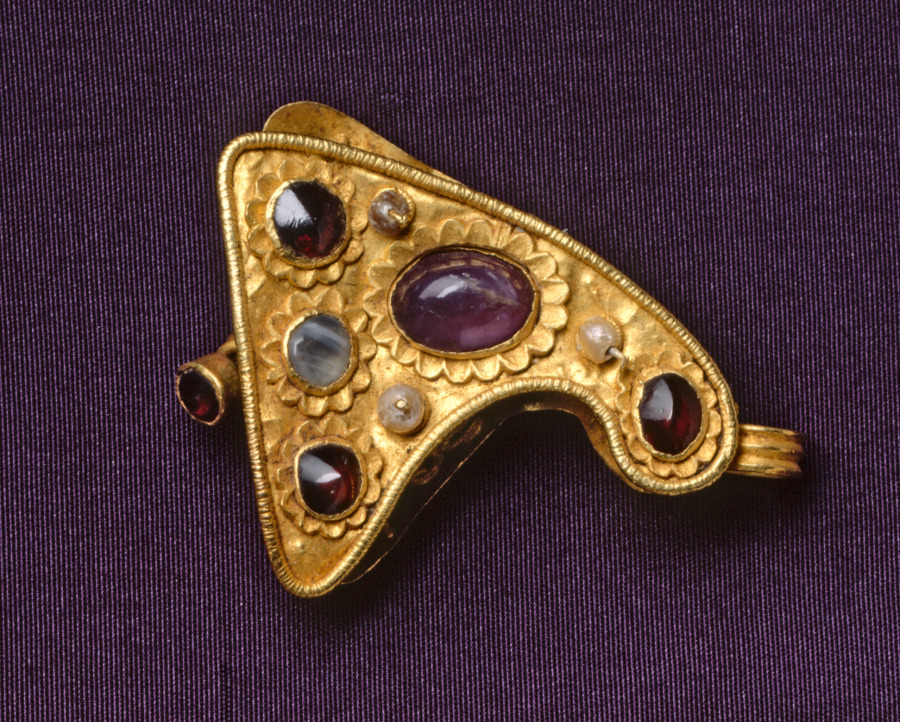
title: Clasp Set with Semiprecious Stones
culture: Byzantium, Late Roman, Eastern Mediterranean, (probably Sirium or Nicomedia), Byzantine period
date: 324–26 CE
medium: gold and semiprecious stones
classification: Jewelry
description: Mounted at the center of this octagonal pendant is a rare coin issued by Constantine the Great, the Roman Empire’s first Christian emperor. Constantine’s portrait appears on the coin’s front, those of two of his sons on the back. Constantine’s image is surrounded by male and female busts, some of which are mythological figures. The pendant once formed the centerpiece of a sumptuous gold necklace, likely a gift for a high-ranking court official or member of the imperial family.